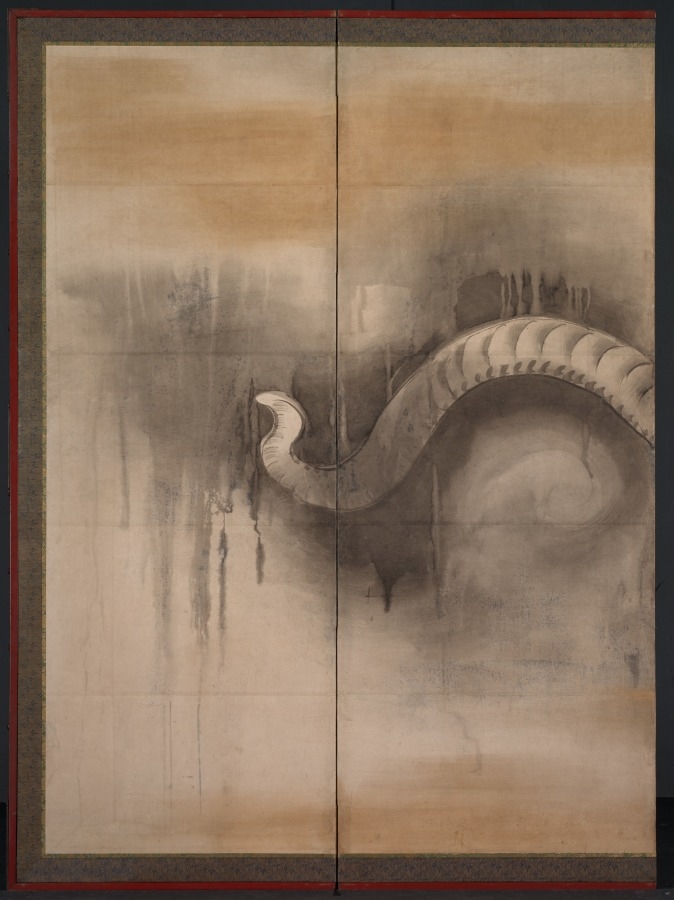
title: Dragon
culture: Japan, Edo period (1615–1868)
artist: attributed to Soga Nichokuan (Japanese)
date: early to mid-1600s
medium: six-panel folding screen; ink, slight color, gold, and silver on paper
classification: Painting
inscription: Signed: Soga Chokuan II (Soga Chokuan ni). Sealed: Hoin (right), Soga Chokuan Hoin (three seals at left) Edo period (1615-1868)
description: A dragon dives through clouds on this screen, while on the other screen, a tiger looks upon a waterfall as it prowls out of a bamboo grove. Tiger and dragon are traditional symbols of the balancing forces in the world, yin (the feminine aspect) and yang (the masculine aspect). This painting has a signature and seals, identifying it as a work by Soga Nichokuan, a painter thought to be from Sakai (near Osaka), and known primarily for his representations of hawk-eagles (kumataka).